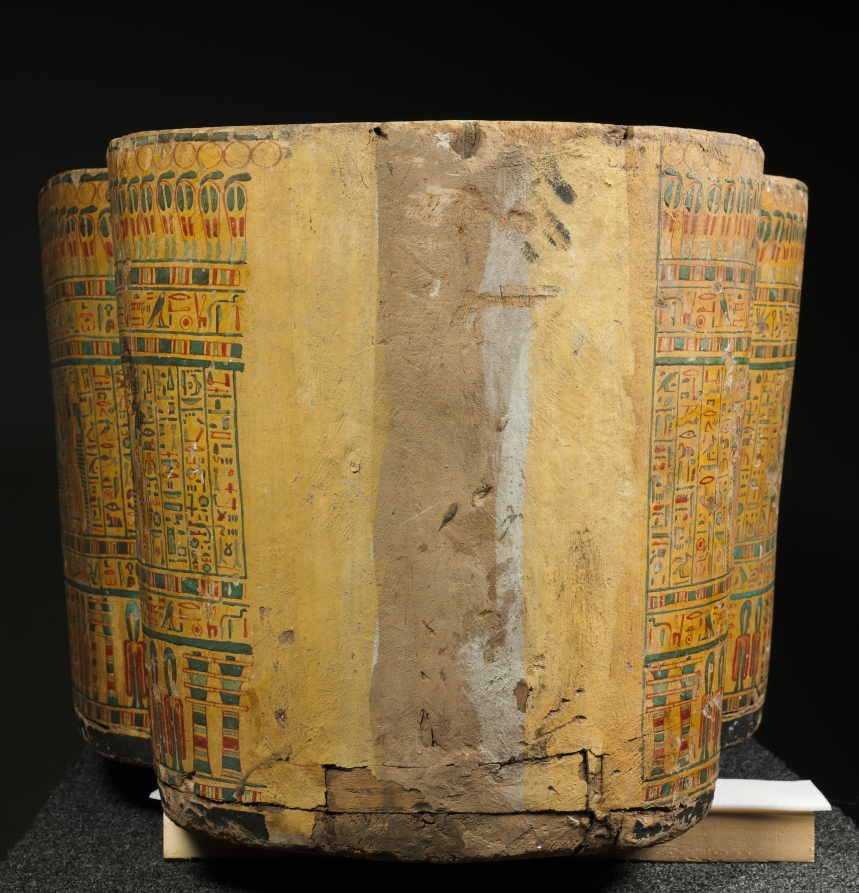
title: Coffin of Bakenmut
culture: Egypt, Thebes, Third Intermediate (1069–715 BCE), Dynasties 21–22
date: c. 1000–900 BCE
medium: gessoed and painted sycamore fig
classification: Funerary Equipment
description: The coffin of Bakenmut is one of the finest examples of painted wooden coffins made for the priests of Amen and their families at Thebes during Dynasty 21 and early Dynasty 22. The pharaohs of this time were no longer buried in the Valley of the Kings, but instead built tombs in the Delta, far to the north, where they resided. Security was lax in the Theban necropolis. The coffins and funerary goods of the wealthy citizens of Thebes were placed in unmarked and undecorated family tombs cut into the cliffs on the west bank of the Nile. All the care and detail that in more prosperous times were devoted to the decoration of the tomb chapel were now lavished on the elaborately painted coffins. Every available surface is crowded with religious scenes, images of funerary gods and goddesses, protective spells, and magical symbols. The deceased appears mummiform. An elaborate floral collar entirely covers the upper body, exposing only the separately attached hands (now lost). A pair of red "mummy braces" are crossed over the chest, their point of intersection marked by a winged sun disk. The lower body is covered with tiny figures modeled in gesso against a yellow background, which gives the effect of gold inlaid with glass or semiprecious stone. The decoration on the interior features two deified dead kings of Dynasty 18. Although these rulers had lived centuries before, memory of their greatness was still very much alive. The main scene near the top depicts Tuthmosis III, the great military pharaoh, who lived 500 years before Bakenmut. Posed as a mummy, the ruler wears a brilliant feathered garment enfolding him with falcon’s wings. The scene below features back-to-back seated images of Amenhotep I, regarded as the patron of the Theban cemetery and worshiped as a local god there.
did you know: Originally another smaller coffin was placed inside this outer coffin and in that the deceased with a mummy board would have rested.